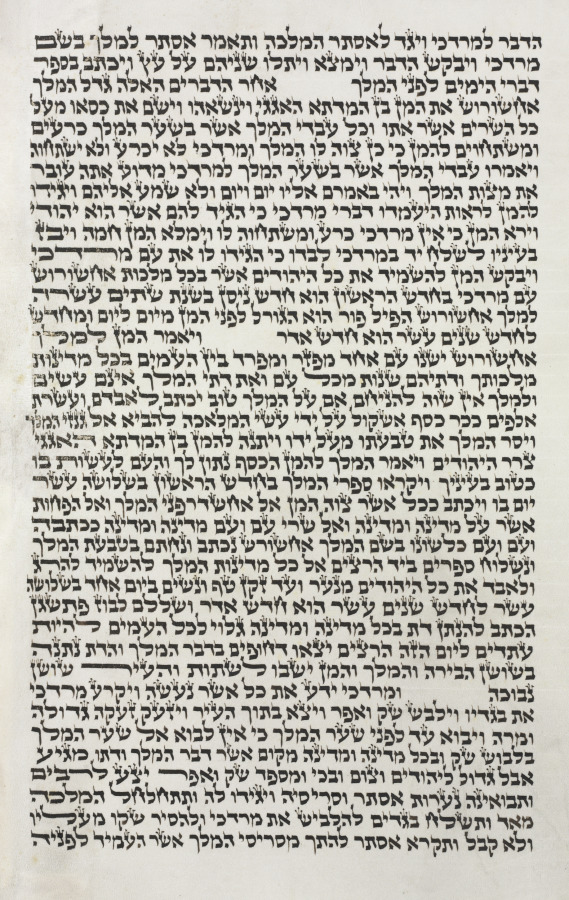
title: Scroll of Esther for the Purim Festival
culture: Europe (Eastern?), Hebrew, 19th century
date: c. 1850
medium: ink on vellum (eight columns, 39 lines of text on three membranes)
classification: Manuscript